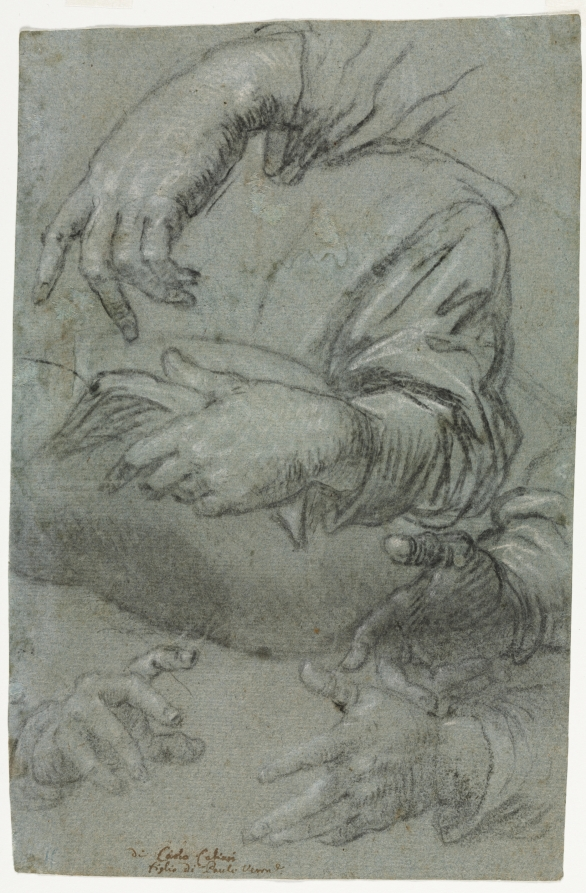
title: Studies of Hands (recto)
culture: Italy, 16th century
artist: Carletto Caliari (Italian, 1570–1596)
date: c. 1586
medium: charcoal (stumped in places) heightened with white chalk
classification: Drawing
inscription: lower center, in brown ink: di Carlo Caliari / figlio di Paulo Verone.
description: The talented second-born son of Italian Renaissance painter Paolo Veronese, Carletto Caliari assisted his father in the final years of the celebrated artist’s life. Successful Venetian painting studios were run as workshops, with staffs of trained apprentices working under a master’s supervision to simultaneously execute a multitude of commissions. Drawings such as this study of expressive hand gestures were used as reference materials to ensure stylistic consistency within the shop.